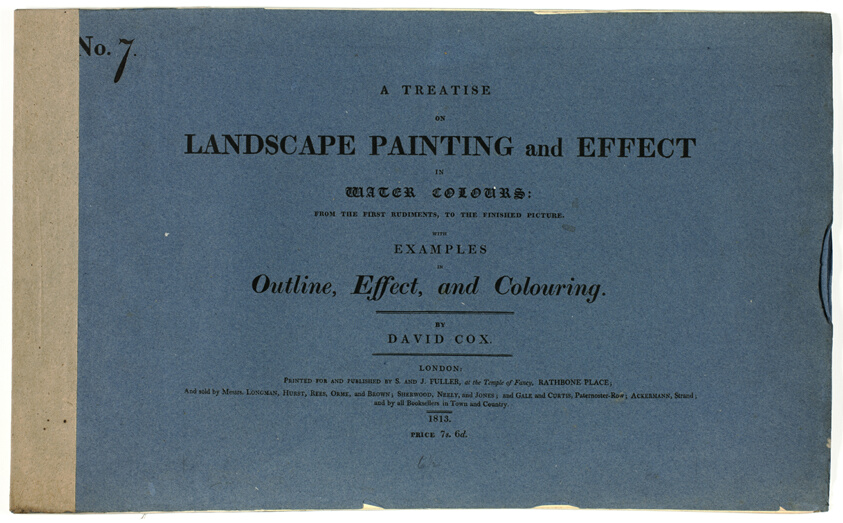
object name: Book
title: A Treatise on Landscape Painting and Effect in Water Colours: From the First Rudiments, to the Finished Picture No. 7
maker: David Cox, the elder (English, 1783-1859); engraved by Richard Reeve (English, 1780-c. 1835); published by S. and J. Fuller (English, 19th century)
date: 1813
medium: Book with four aquatints and letterpress in black on cream wove paper, in box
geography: England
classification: book; paper; prints and drawing